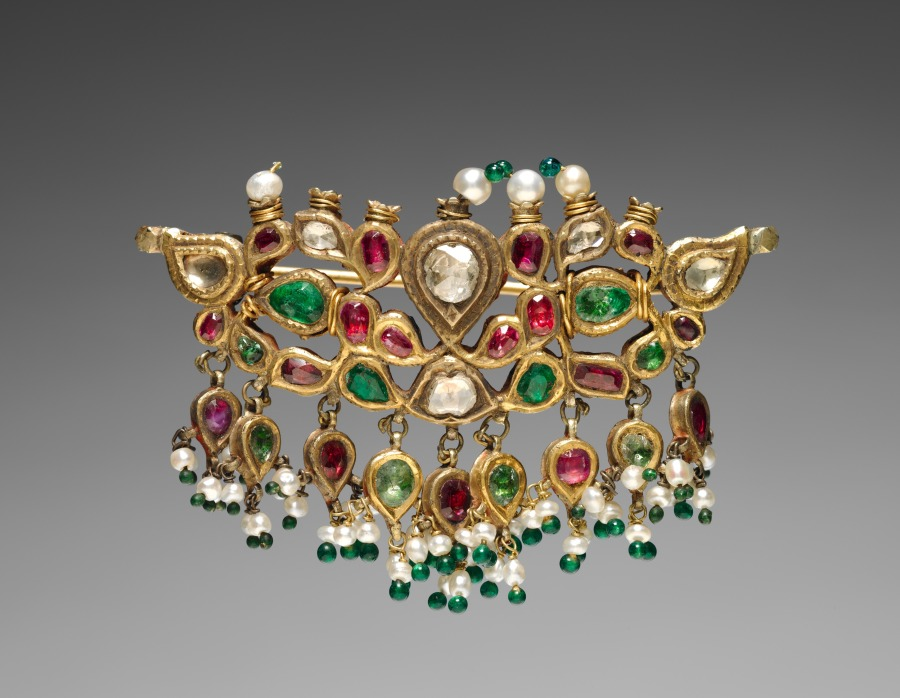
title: Brooch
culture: India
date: 1800s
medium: silver gilt with diamonds, emeralds, rubies and pendant pearls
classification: Jewelry